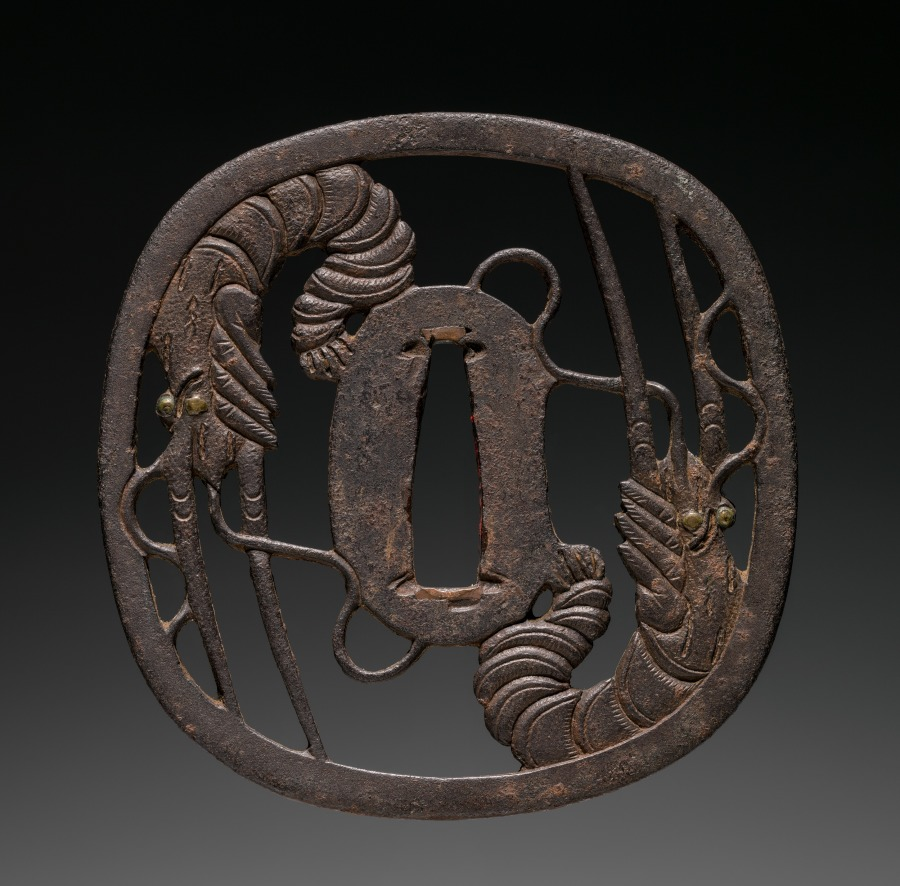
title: Sword Guard (Tsuba) with Prawns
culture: Japan, possibly Edo period (1615-1868)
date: c. 1615–1868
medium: iron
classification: Arms and Armor